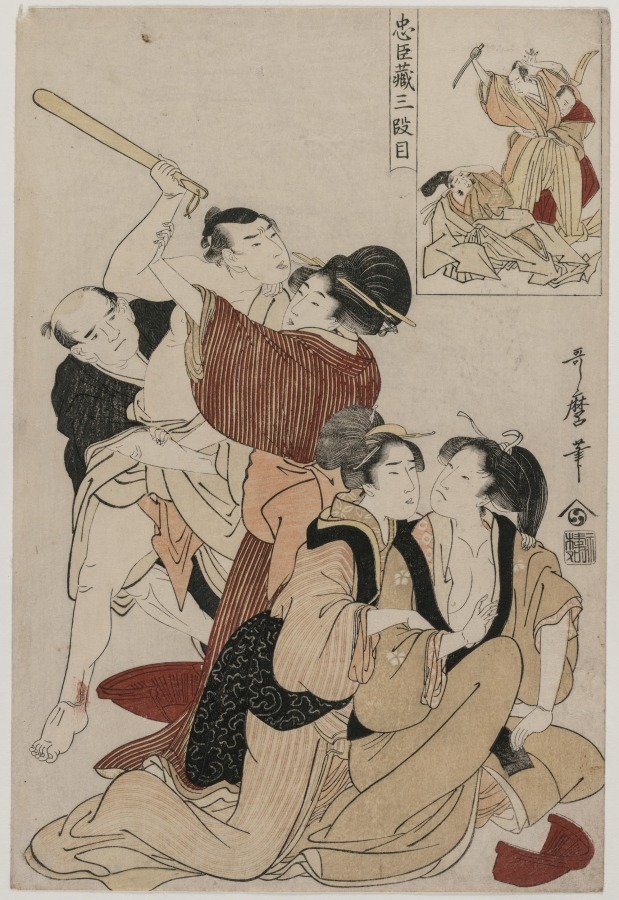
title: Chushingura: Act III of The Storehouse of Loyalty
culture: Japan, Edo period (1615–1868)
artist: Kitagawa Utamaro (Japanese, c. 1754–1806)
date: late 1790s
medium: color woodblock print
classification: Print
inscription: Signature: Utamaro hitsu Publisher: Nishimuraya Yohachi (Eiju han, emblem)